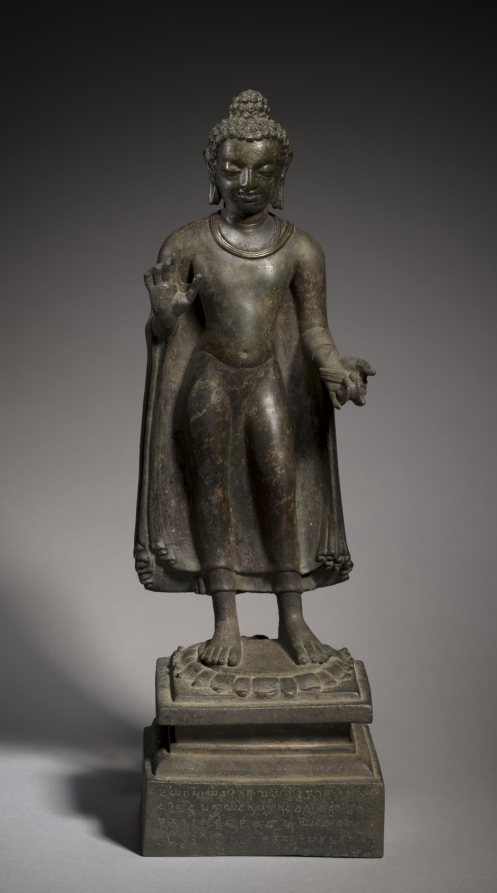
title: Standing Buddha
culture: Northern India, Uttar Pradesh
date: 591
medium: bronze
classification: Sculpture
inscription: 1. ṹ deyadharmmoyaṃ laḍitagrāme yaṃgvalvihāre śā[kya] bhikṣuṇyā 2. pariśuddhamatyā yadattra puṇyaṃ tadbhavatu sarvvasatvānā- 3. manuttarasarvva jñānāvāptaye/ / saṃvat 4a. 500 10 3/ / caityakūta jinabandhuvihārapūrvva-bhuddeśe 4b. piṇḍakena bhojanaṃ karttavya*/ / *Mistake for karttavyam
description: This bronze Buddha is exceptional, because it carries an inscription on its base that dates its manufacture to the year 591. According to the inscription, the sculpture was dedicated by a nun who was from a village in Nepal, but she probably commissioned it at a workshop in northern India. The Buddha's robe on this image has been left plain, without pleat lines to obscure the beauty of the contours of the body. Only the rippling scalloped clusters of the garment’s hem lend some sense of energy and subtle ornament to the composition.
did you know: Around the time when this sculpture was made, portable bronzes began to replace relics as the principal sacred commodity circulating in the Buddhist world.